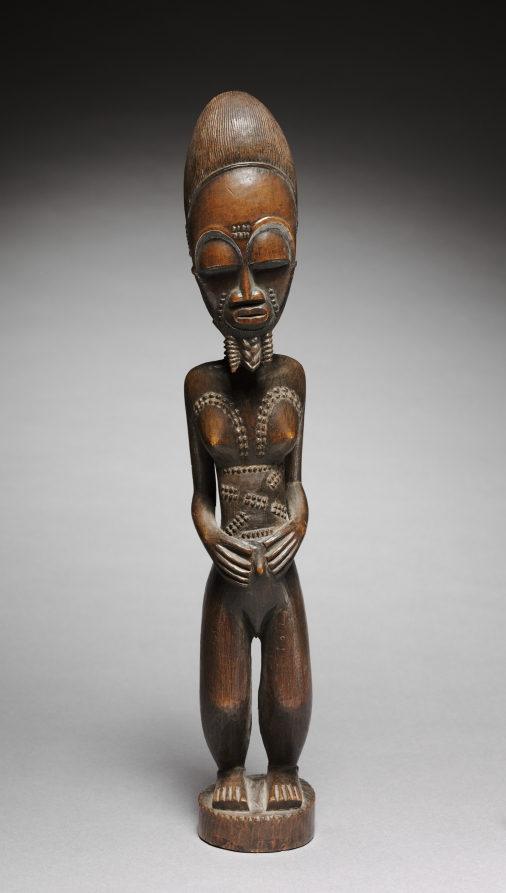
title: Male Figure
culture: Africa, West Africa, Côte d'Ivoire, Baule peoples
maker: Totokro Master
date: by 1931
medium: wood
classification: Sculpture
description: Purported to be the earliest surviving work by a Baule carver who art historians have dubbed the "Totokro Master," this Male Figure typically comes as a pair of male and female sculptures, and serves as a bridge between the spirit (asye usu) and human worlds in the hand of Baule diviners. Representing idealized humans in their prime, the diviners consider them suitable forms used to cast out disruptive spirits. It is featured here without the female example. The African Art Sponsors—a group of donors associated with Cleveland’s Karamu House, the oldest African American theater group in the country—purchased this Baule male figure in 1929 and donated it to the museum in 1931.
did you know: In Baule society, the name of the artist who made a sculpture is not always public knowledge. In 1999, art historian Susan Vogel gave the sculptor of this work and others similar in style the nickname "Totokro Master" for the geographic region they came from.